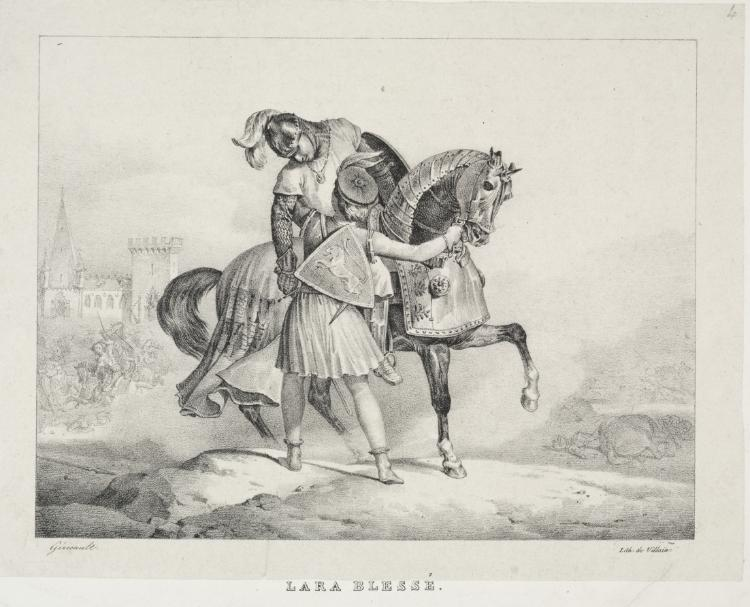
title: Lara Wounded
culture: France, 19th century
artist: Théodore Géricault (French, 1791–1824)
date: 1822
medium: lithograph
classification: Print